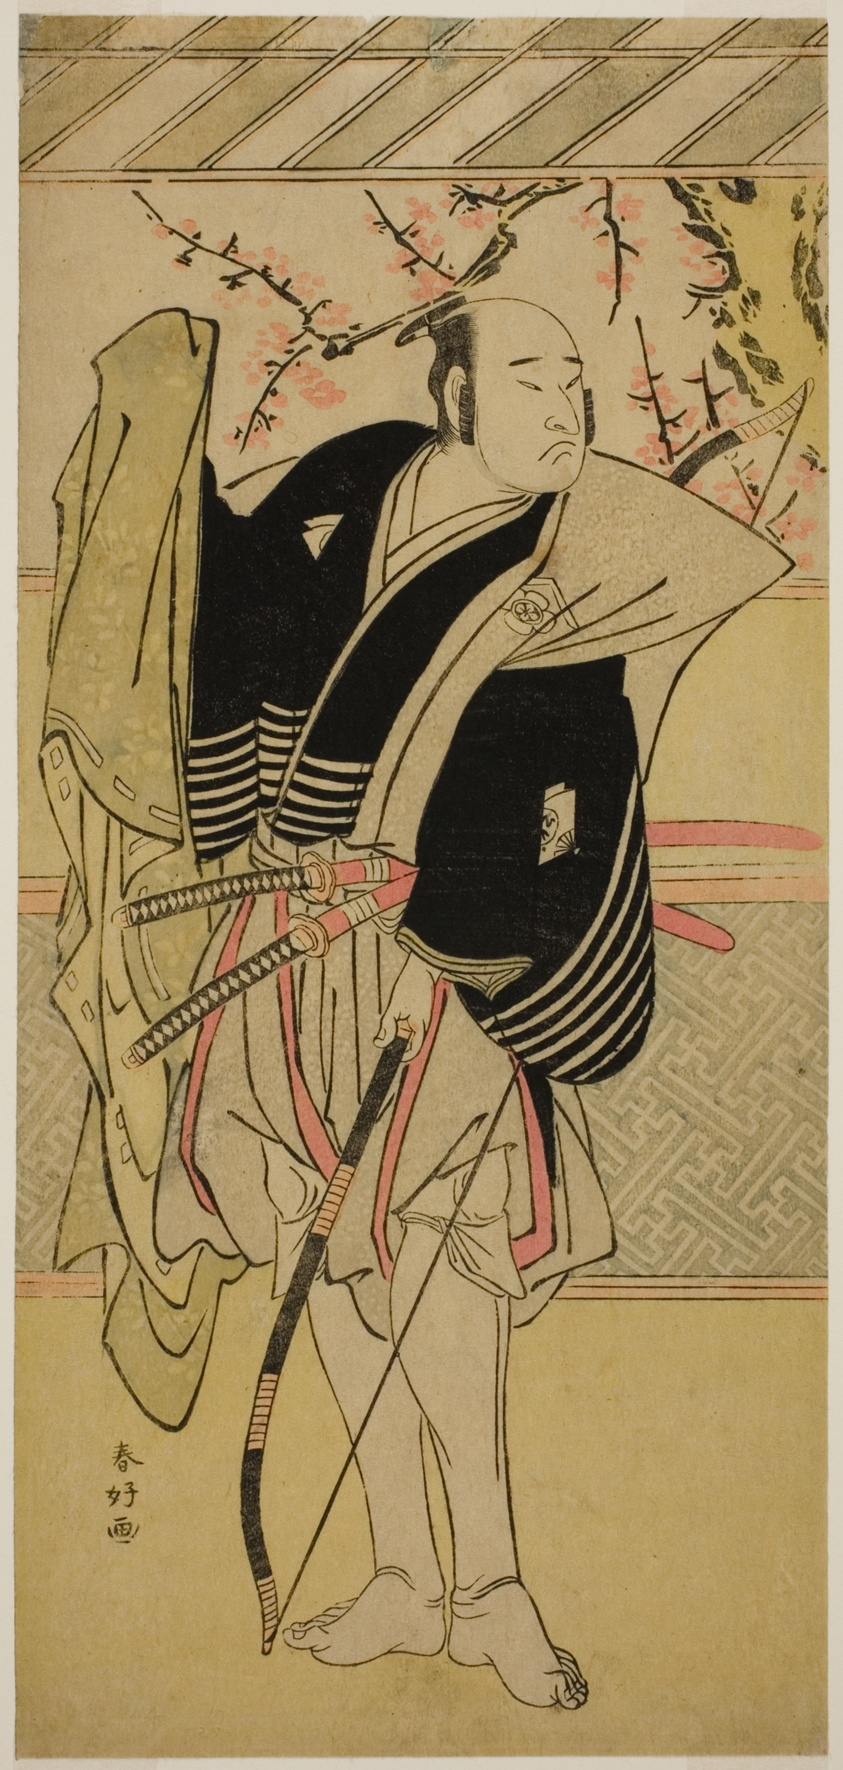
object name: Print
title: The Actor Onoe Matsusuke I as Yawata no Saburo (?) in the Play Edo no Hana Mimasu Soga (?), Performed at the Nakamura Theater (?) in the First Month, 1783 (?)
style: Japanese (culture or style)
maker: Katsukawa Shunko I; Japanese, 1743-1812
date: c. 1783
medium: Color woodblock print; hosoban; from a multisheet composition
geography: Japan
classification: woodblock print; print; asian art